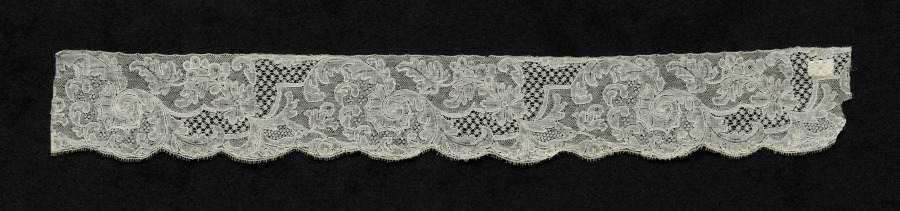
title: Lace Edging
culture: Belgium, Mechelen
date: 1700s (Regency period)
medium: Linen: bobbin lace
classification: Lace